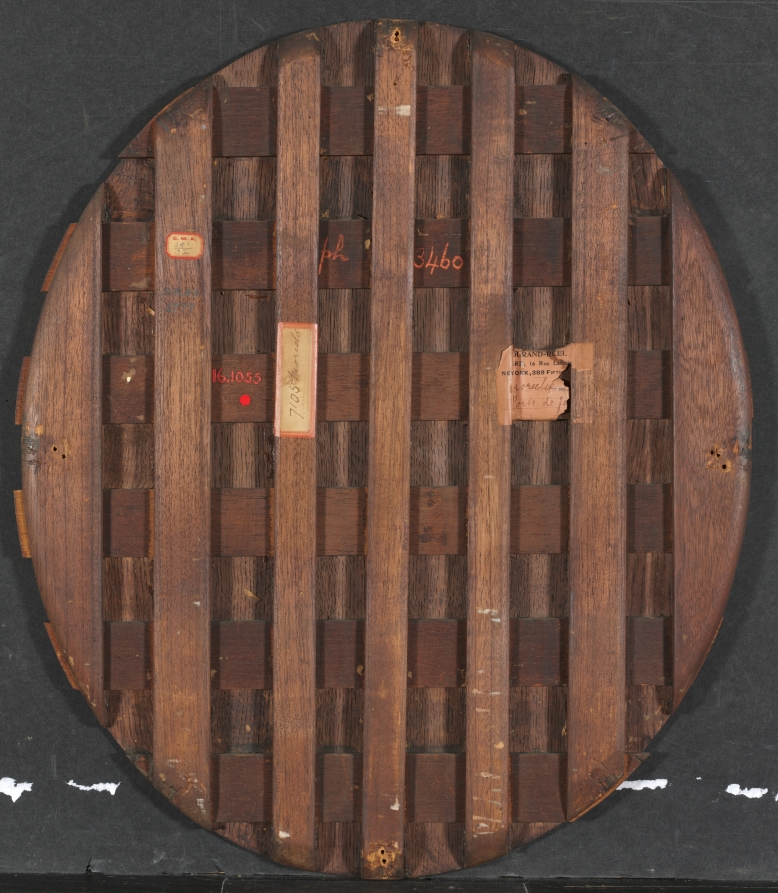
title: Portrait of a Woman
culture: Netherlands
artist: Jan Anthonisz. van Ravesteyn (Dutch, c. 1570–1657)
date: 1620s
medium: oil on wood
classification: Painting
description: How do you conserve a painting when portions are missing? The mid-treatment image (below) shows the painting after cleaning, when earlier restorations had been removed. In the painting on view, notice how the conservator reconstructed portions of the sitter’s lace collar and elaborate necklace. She re-created missing passages after studying the artist’s technique in other works and carefully emulating his treatment of the remaining lace and elements of the twisting, three-dimensional necklace. Conversely, there was not enough information to reconstruct what was probably another ornament at the back of the sitter’s head, so the decision was made not to speculate and invent something in that space.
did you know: The sitter wears several transparent and translucent white collars that become opaque when layered.